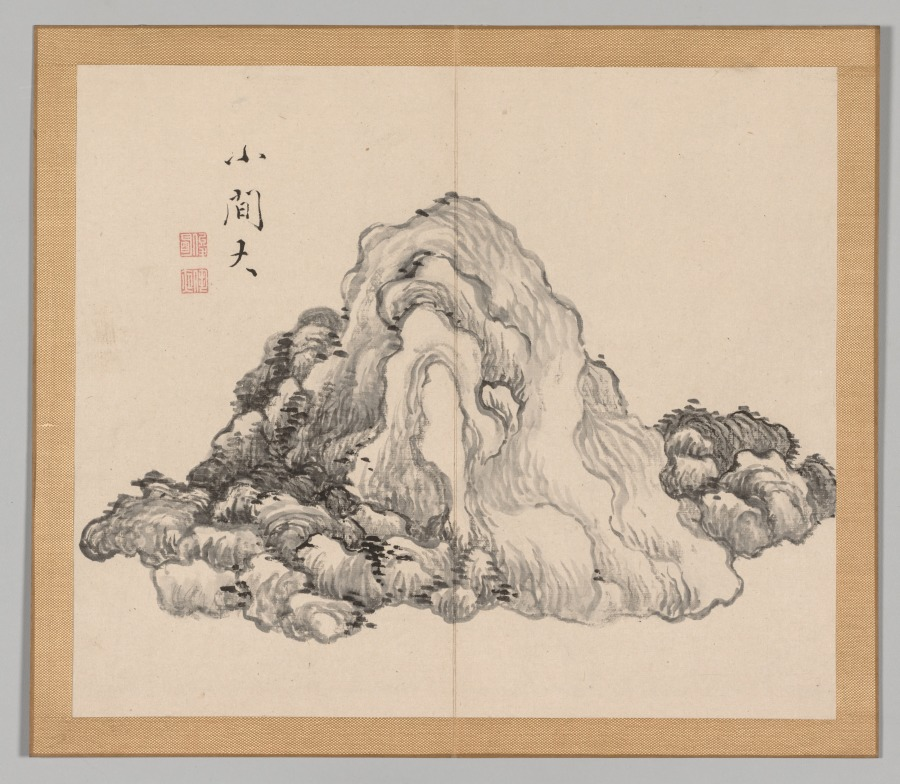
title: Reverberations of Taiga, Volume 1 (leaf 7)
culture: Japan, Edo period (1615–1868)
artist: Aoki Shukuya (Japanese, d. 1802)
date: mid- to late 1700s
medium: double-leaf from a pair of albums; ink and light color on paper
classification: Portfolio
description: Traditionally, young painters in Japan began their studies with an established master-painter. The master's compositions invariably became models that the apprentice copied to learn various ink and brush techniques. Shukuya was a pupil of the famous Kyoto artist Ikeno Taiga, whose style is reflected in these sketches of rocks, trees, and mountains.